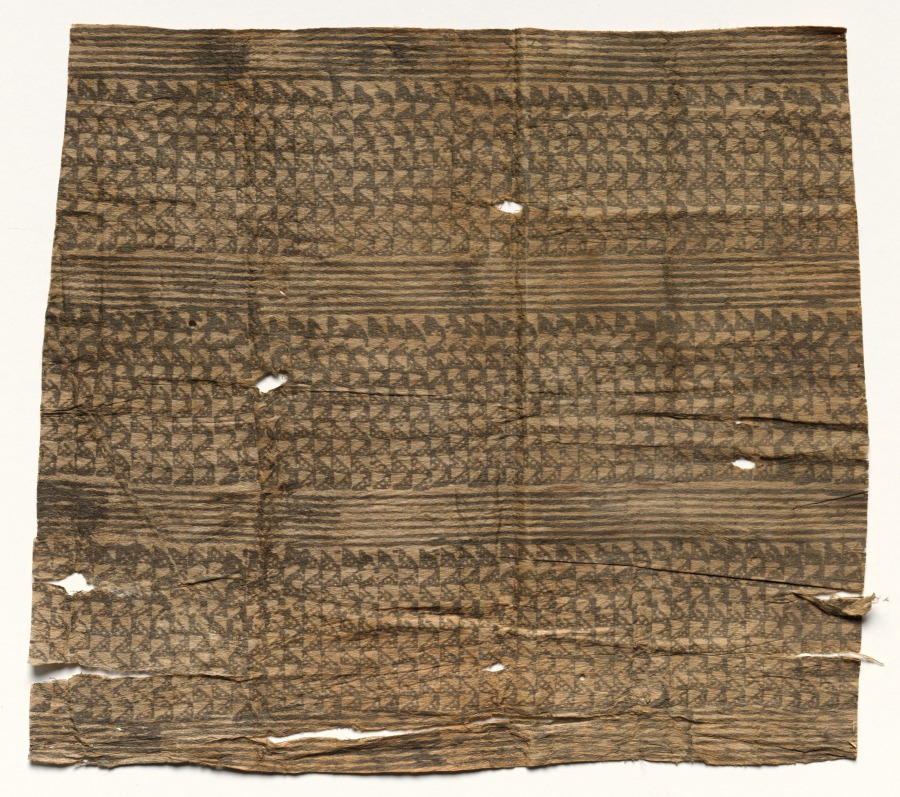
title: Tapa Cloth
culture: Oceania, Polynesia, Hawaii, 20th century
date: before 1930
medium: probably mulberry bark (Broussonetia papyrifera)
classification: Textile